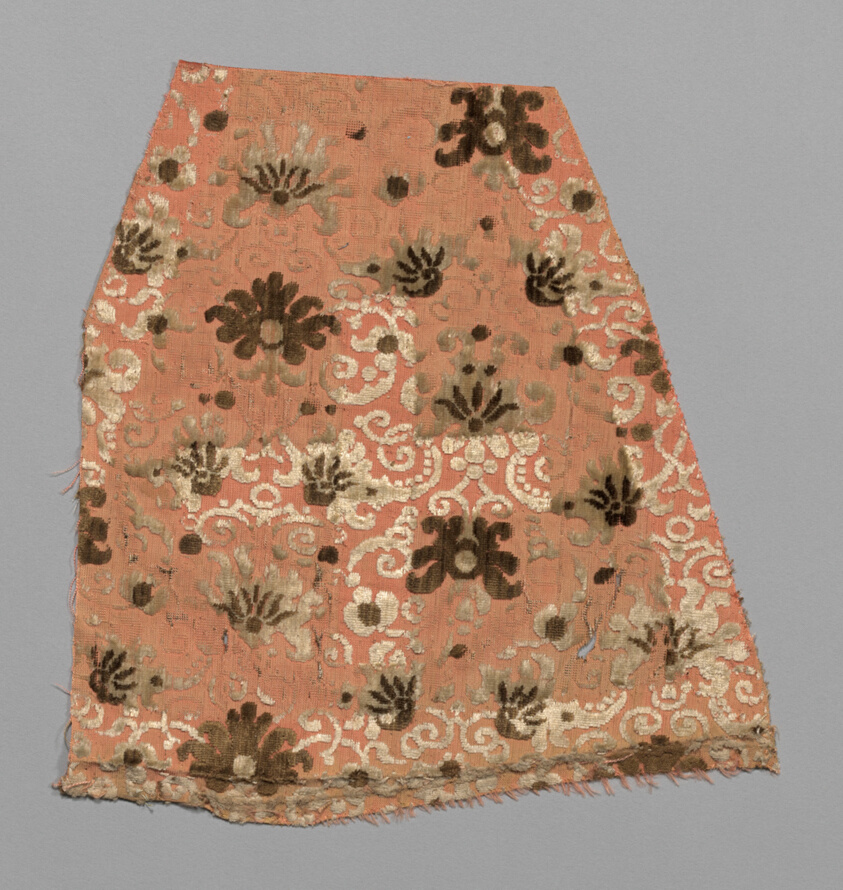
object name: Textile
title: Fragment (Dress Fabric)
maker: Italy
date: 16th/17th century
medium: cut voided cloth velvet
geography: Italy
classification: textile; weaving - velvet; weaving